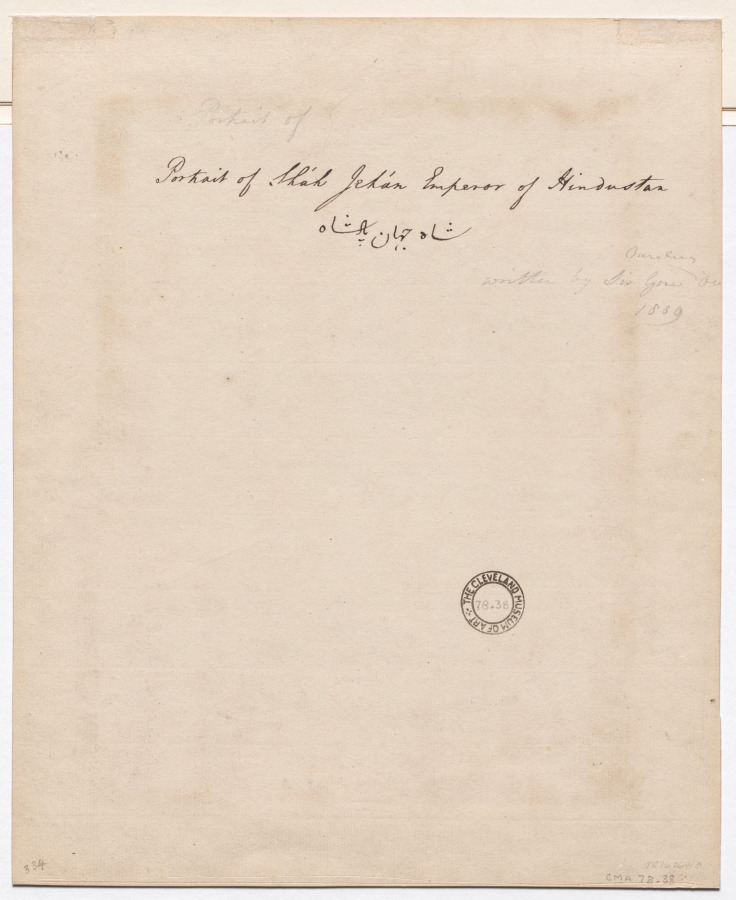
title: Shah Jahan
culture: Netherlands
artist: Rembrandt van Rijn (Dutch, 1606–1669)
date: c. 1656–61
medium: pen and brown ink and brush and brown wash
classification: Drawing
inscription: On verso of secondary support, upper center, in graphite: Portrait of; upper center, in brown ink: Portrait of Sháh Jahán Emperor of Hindustan [inscription in English] / Shah Jahan Padshah [inscription in Persian]; upper right, in graphite: Ouseley / written by Sir Gore Ou[seley] 1809; lower left, in graphite: 334; fragment of old mount (now removed), in blue pencil: 3[crossed out with black ink]; fragment of old mount (now removed), in gray ink: Portrait of Sháh Jehán / Emperor of Hindûstan; in black ink: 5[written over 5 in graphite] Indian Prince [underlined]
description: Rembrandt’s drawing portrays Shah Jahan, the ruler of the Mughal Empire from 1628-58. It is one of twenty-three drawings that Rembrandt made after Indian miniatures, which he had very likely studied in an album then in Holland. By the 18th century, the album had been dismantled, and the model for this drawing now resides at the Schloss Schönbrunn, Vienna. Rembrandt imposed his characteristic realist tendencies on a more detailed, formal, and stylized model, bringing the shah to life with especially fine pen strokes on the face and shoes mixed with evanescent brown ink washes around the figure that introduce a dynamic interplay of light, shade, and figure. Above the shah’s head, he scratched away parts of the ink and paper to create a nimbus shape that frames the profile. His meticulous technique and use of a rare and expensive Japanese paper suggest that he regarded his drawings after Mughal paintings as exceptional.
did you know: The Mughal ruler portrayed in this drawing carries a fly swatter in his left hand.